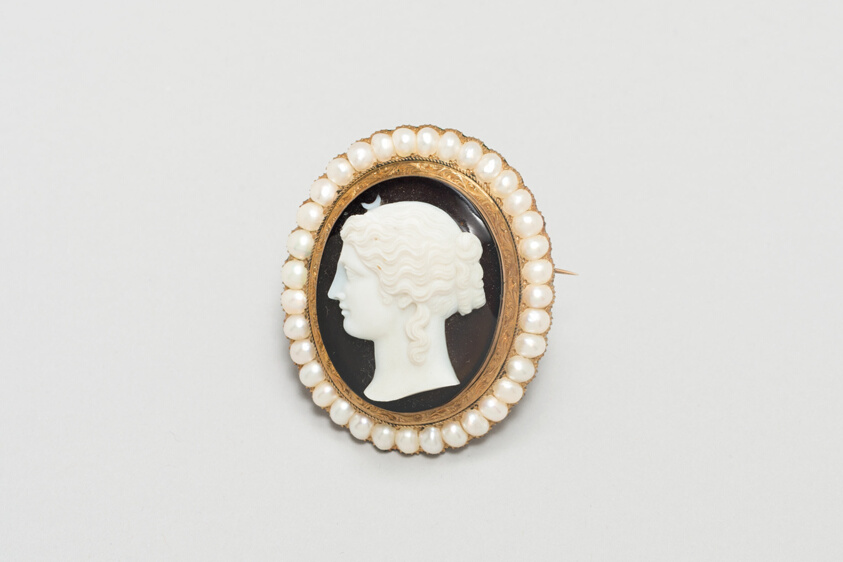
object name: Metalwork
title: Brooch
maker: Possibly France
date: Early 19th century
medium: Stone, gold, and pearls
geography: France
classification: jewelry; european decorative arts; metalwork